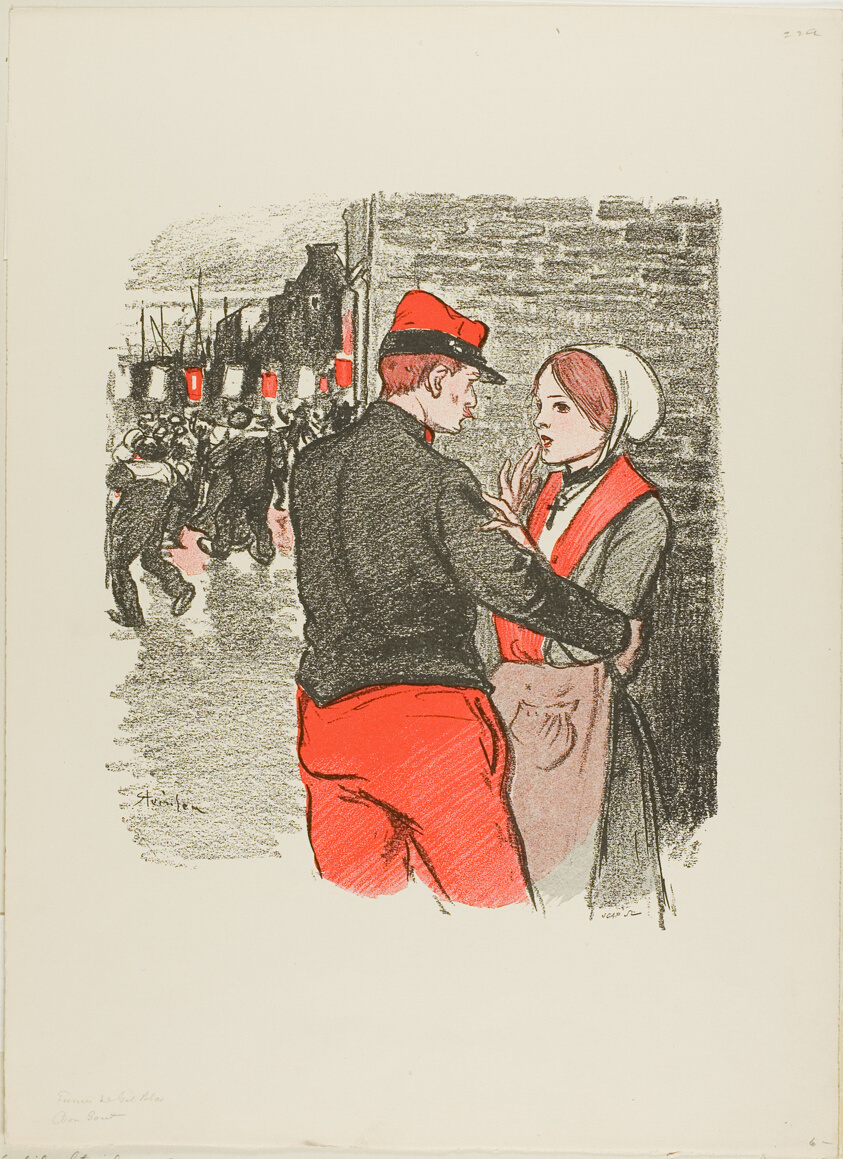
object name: Print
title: Good Taste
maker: Théophile-Alexandre Steinlen; French, born Switzerland, 1859-1923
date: published September 15, 1895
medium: Photorelief print in red and black on ivory wove paper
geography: France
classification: photorelief; print; prints and drawing